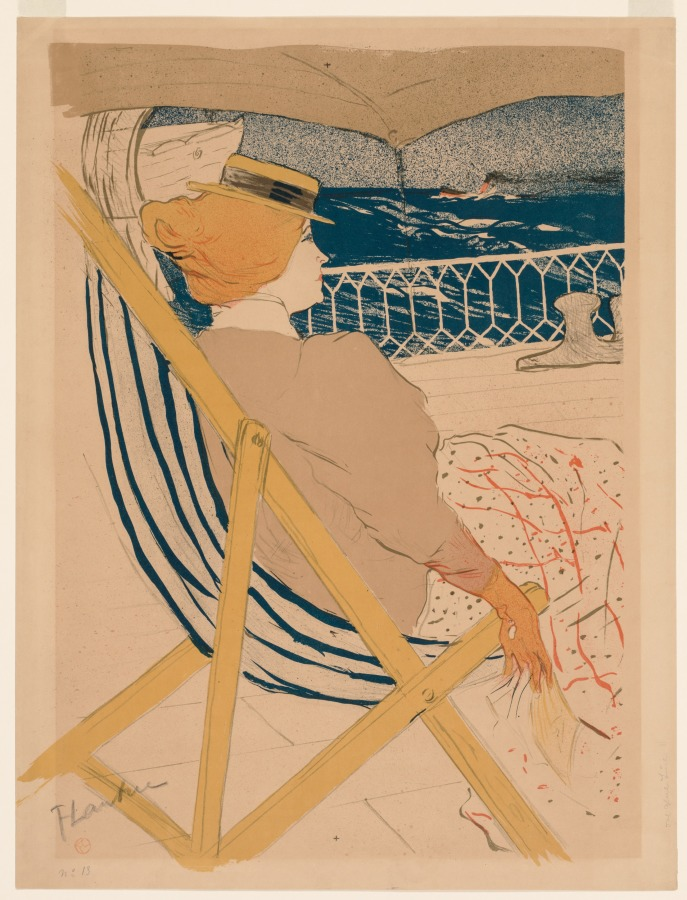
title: La Passagère du 54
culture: France, 19th century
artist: Henri de Toulouse-Lautrec (French, 1864–1901)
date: 1896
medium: lithograph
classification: Print